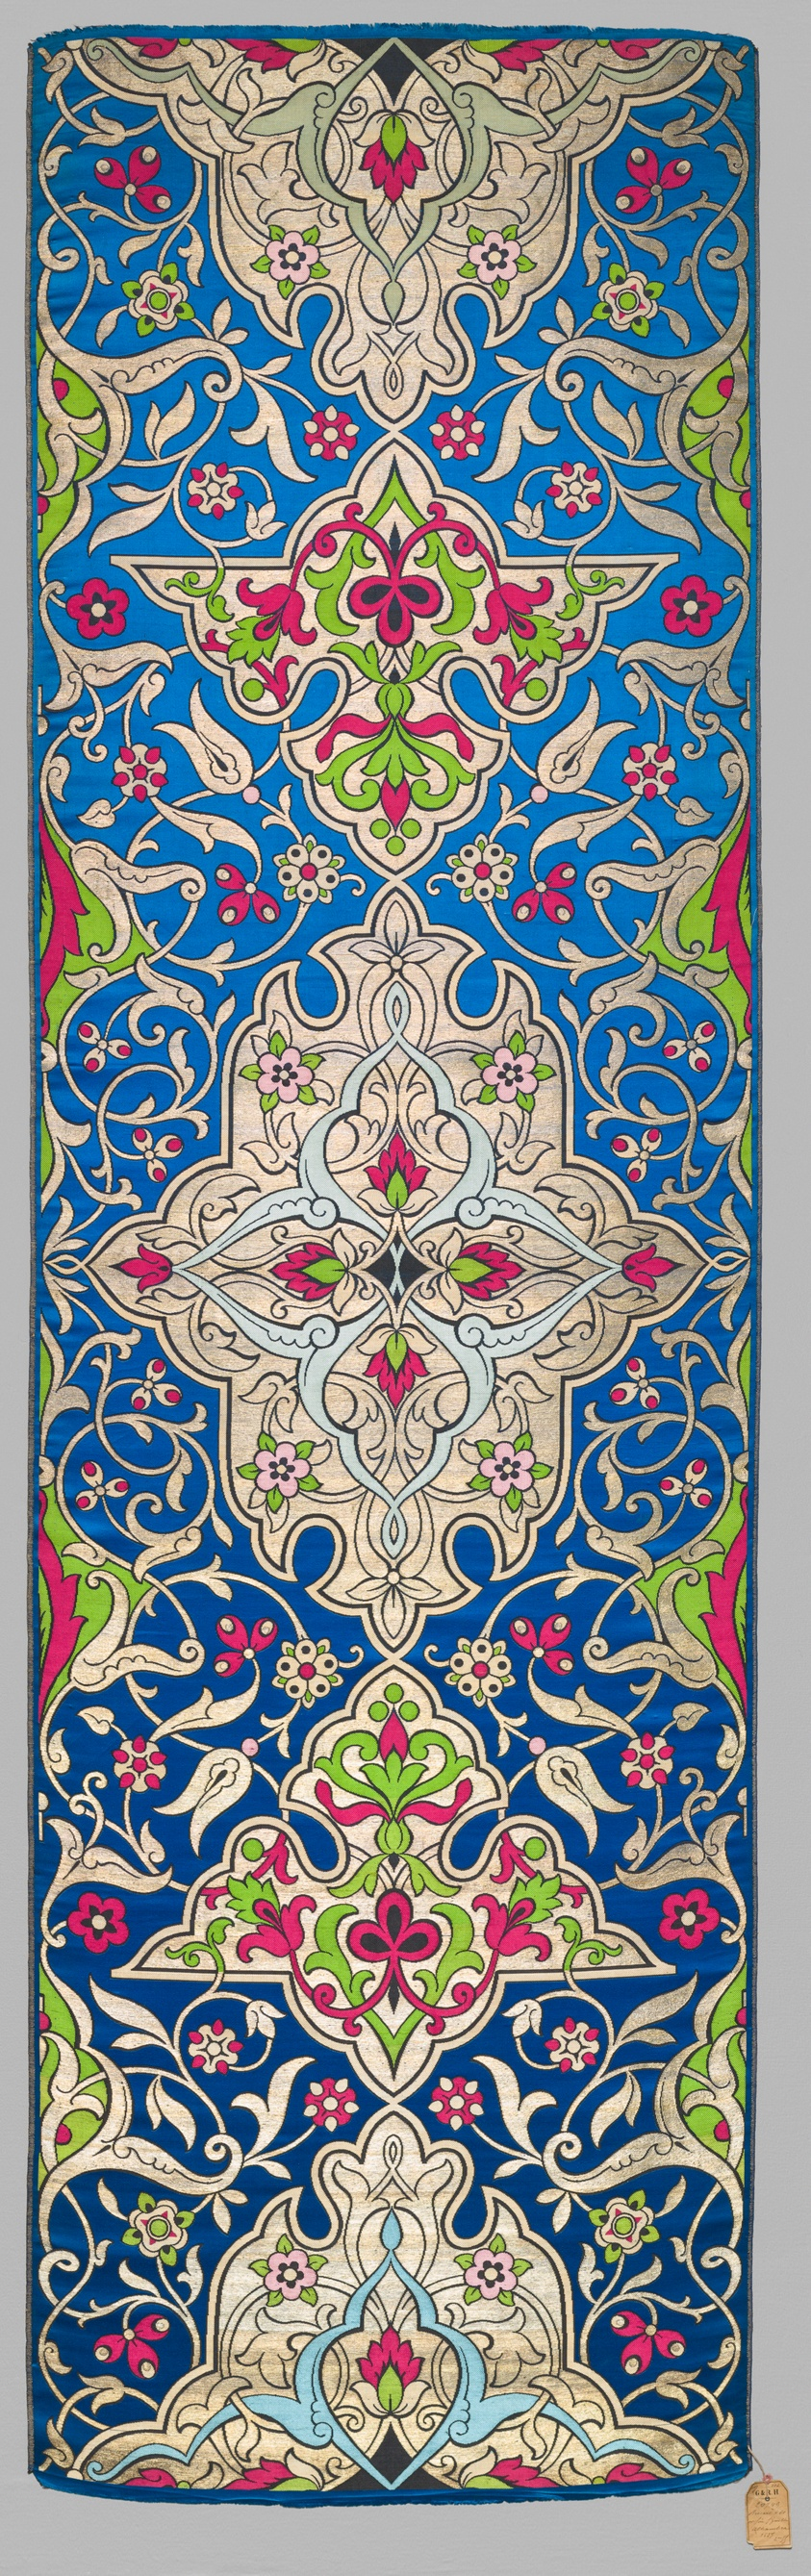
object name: Textile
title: "Alhambra" textile panel with double border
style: Aesthetic Movement, orientalizing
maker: Probably made by Mathevon et Bouvard, French 1750-1970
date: c. 1865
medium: Silk and gilt-metal-strip wrapped silk; satin weave with secondary patterning wefts, and supplementary brocading wefts bound with twill interlacings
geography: France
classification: silk; textile